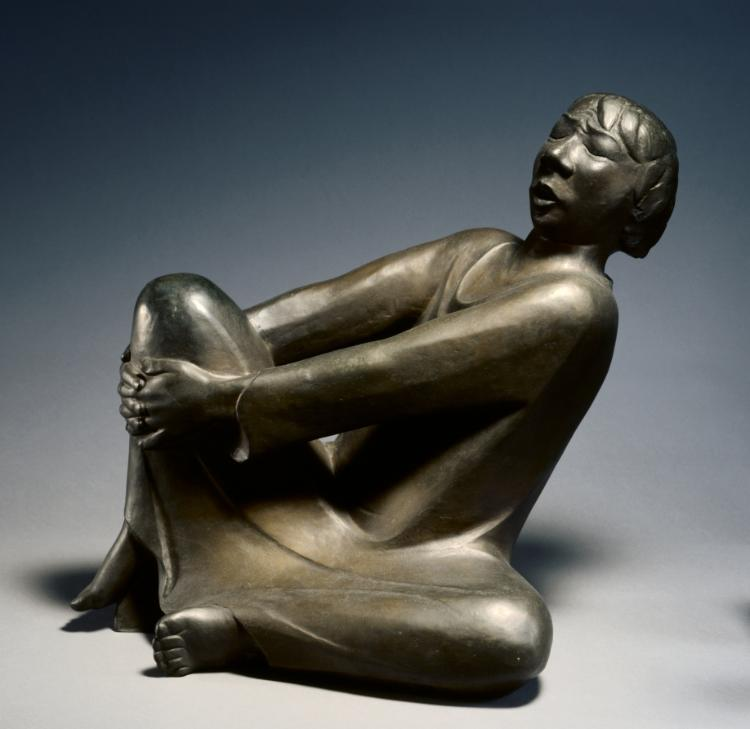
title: Singing Man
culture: Germany, 20th century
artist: Ernst Barlach (German, 1870–1938)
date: 1928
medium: bronze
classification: Sculpture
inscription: Signed on support under right foot: "E. Barlach"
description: One of the most celebrated sculptors of the Expressionist movement in Germany, Barlach first began exploring ways to convey inner feeling through depictions of the human body around 1906. As this singing man pulls his knee toward his body, his closed eyes and open mouth suggest deep concentration. A staunch opponent of the Nazis, Barlach was declared a “degenerate artist” and forbidden to teach or exhibit in Germany.